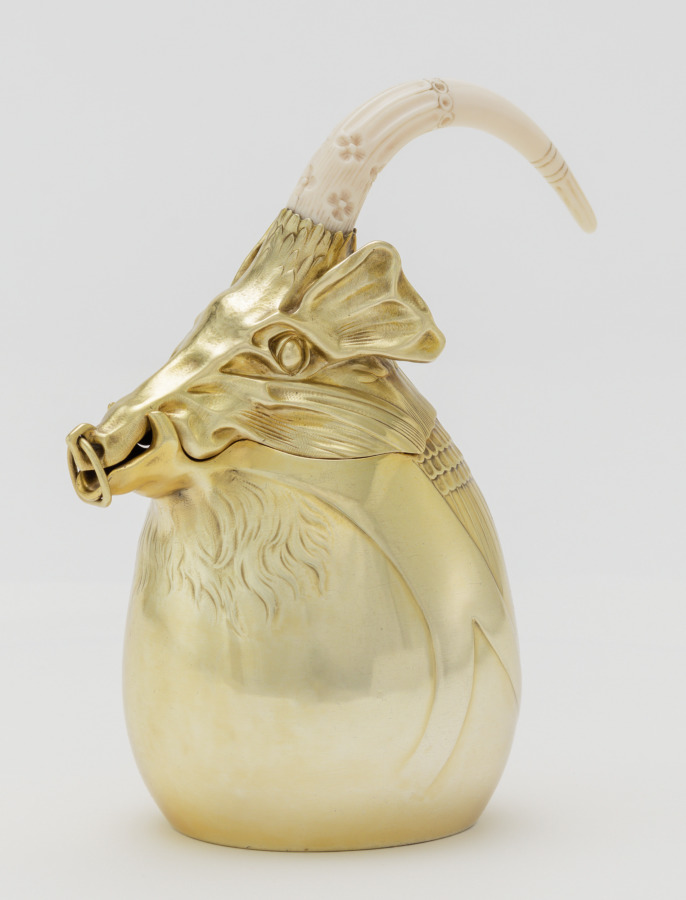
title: Tea Pot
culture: France, Paris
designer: Carlo Bugatti (Italian, 1856–1940)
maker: Adrien-Aurélien Hebrard (French, 1866–1937)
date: c. 1907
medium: Gilt silver and ivory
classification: Silver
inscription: Made by A. A. Hebrard Firm, Paris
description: This tea and coffee service, salver, and table, together with some now missing cups, were all designed by Carlo Bugatti as an ensemble and presented at the 1902 exposition devoted to decorative arts in Turin, Italy. The set was probably acquired from Bugatti's 1907 exhibition at the Galerie Hébrard in Paris by a wealthy South African widow, Anna Blake, who was living there at the time. Some of the animal and insect motifs suggest mythical beasts or the fossils of prehistoric animals. When Mrs. Blake returned to Cape Town, she took these and other pieces designed by Bugatti with her, and they remained in South Africa throughout her lifetime.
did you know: This tea pot is part of a tea and coffee service designed by Carlo Bugatti.